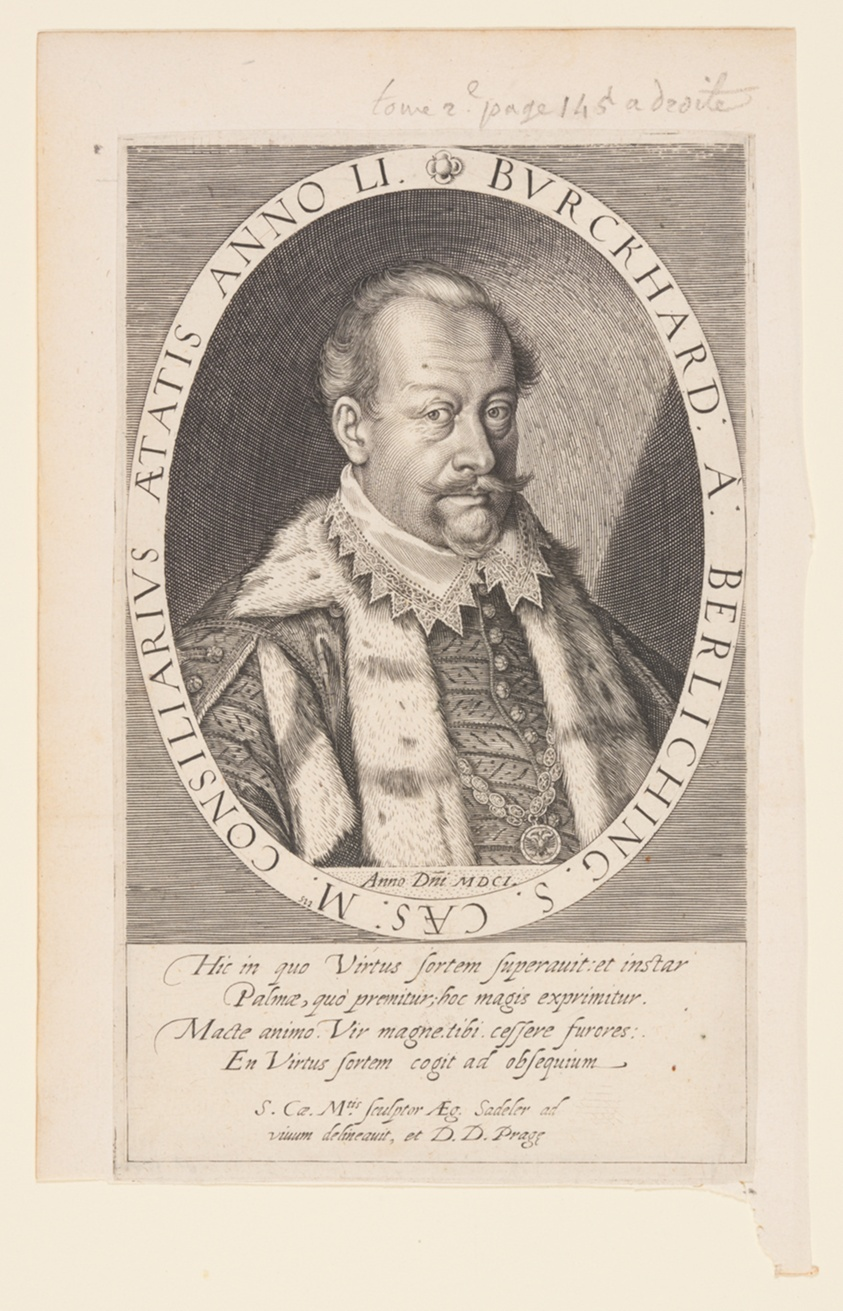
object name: Print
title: Burkhard von Berlichingen, Councilor to Rudolph II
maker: Aegidius Sadeler II; Flemish, c. 1570–1629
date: 1601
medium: Engraving on paper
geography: Flanders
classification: engraving; paper; print; prints and drawing